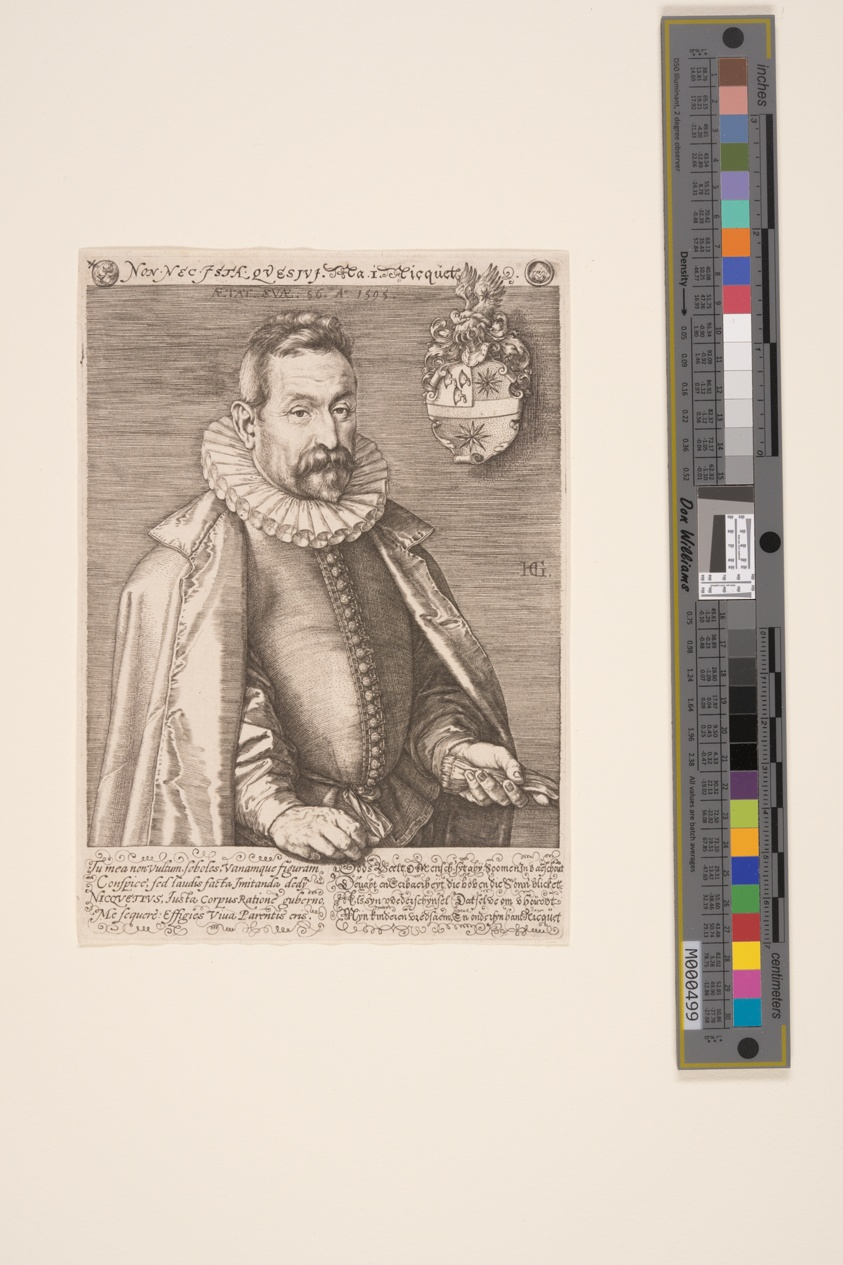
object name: Print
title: Jan Nicquet, Art Collector in Amsterdam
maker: Hendrick Goltzius (Dutch, 1558–1617)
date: 1595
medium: Engraving on laid paper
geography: Netherlands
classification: engraving; paper; print; prints and drawing